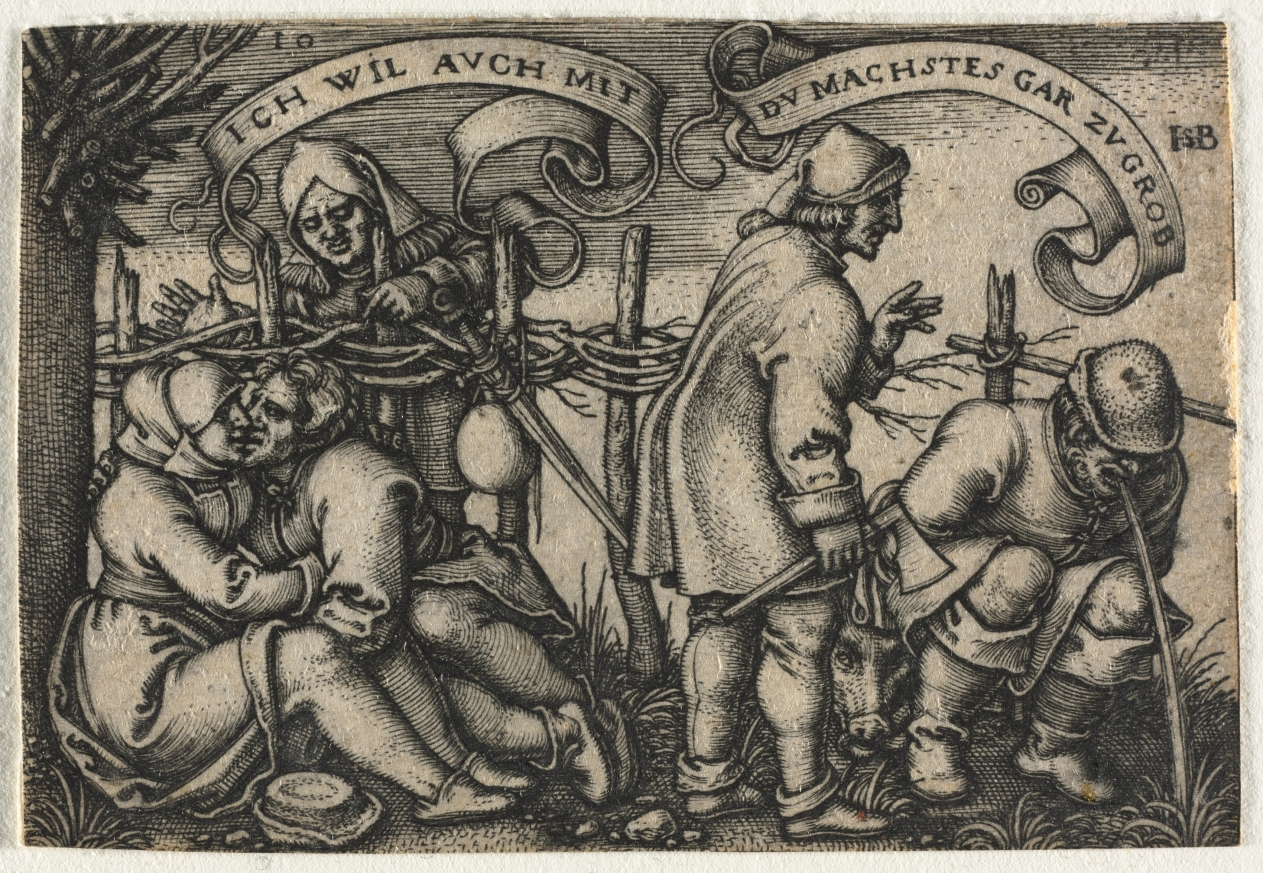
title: The Peasant Wedding or the Twelve Months: No. 10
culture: Germany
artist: Hans Sebald Beham (German, 1500–1550)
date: 1546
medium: engraving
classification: Print